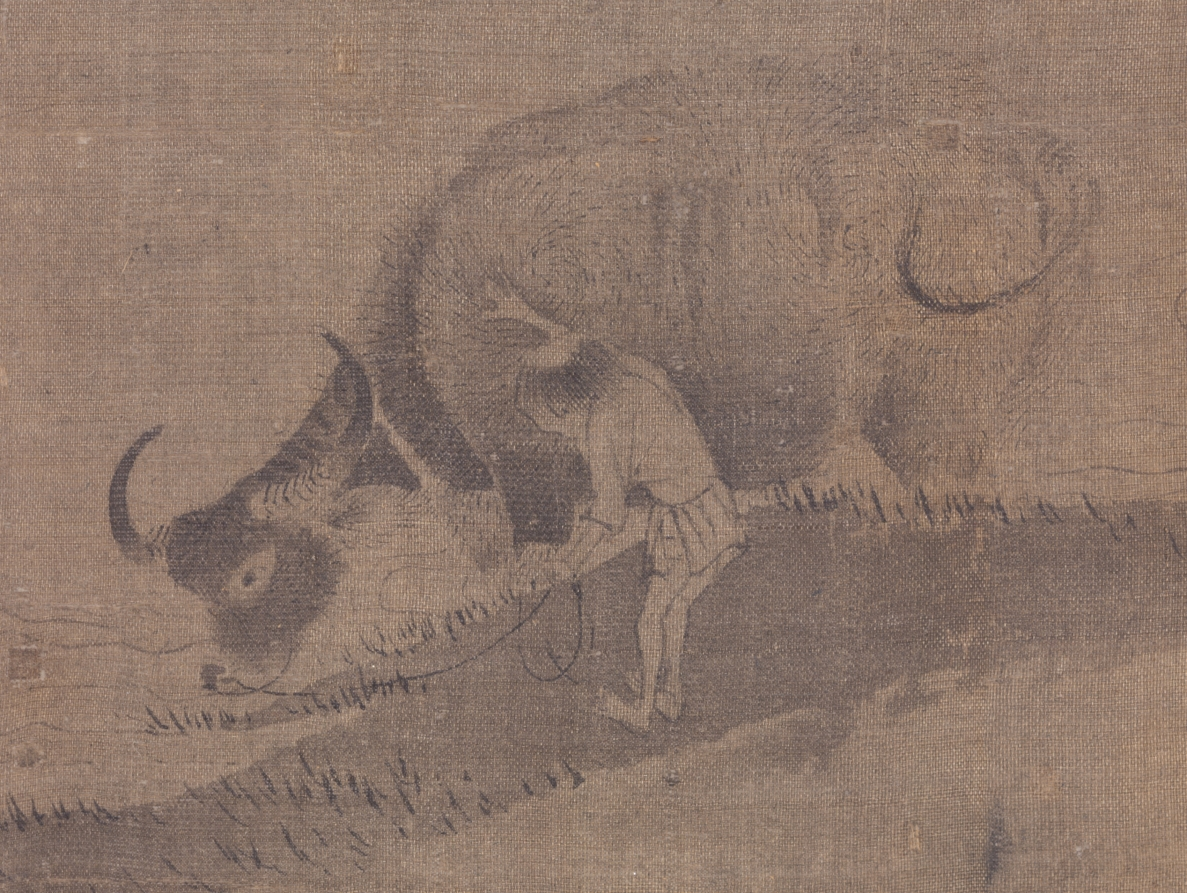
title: Water Buffalo and Herdboys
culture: China, Yuan dynasty (1271-1368)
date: late 1200s–early 1300s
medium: Hanging scroll; ink on silk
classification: Painting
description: In southern China, farmers use water buffalos to help plow their fields, which children often tend. In Buddhist teachings, the subject of herding or taming an ox was used to illustrate the 10 steps to enlightenment, or spiritual awakening. A single image may be read as a metaphorical representation of the Chan process of attaining enlightenment, the difficulty of which was likened to that of finding a strayed buffalo. Here, a buffalo is watered by a boy, another takes a bath in the pond. Chan paintings introduced to Japan were often remounted to fit them into niches for display (tokonoma), which explains the painting’s current format.